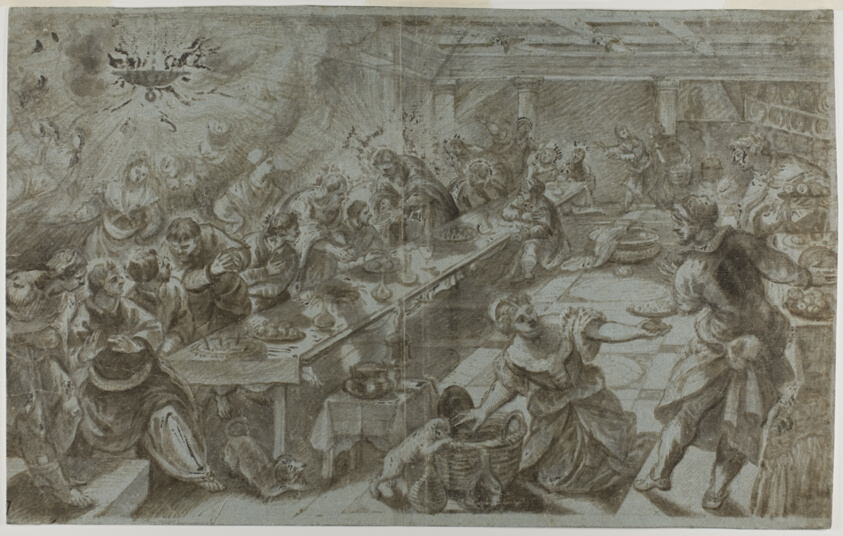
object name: Drawing and Watercolor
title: Last Supper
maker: after Jacopo Robusti, called Tintoretto; Italian, 1519-1594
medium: Brush and brown wash, heightened with lead white (partially oxidized), on blue laid paper, laid down on ivory laid paper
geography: Italy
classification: ink or chalk wash; drawings (visual works); prints and drawing